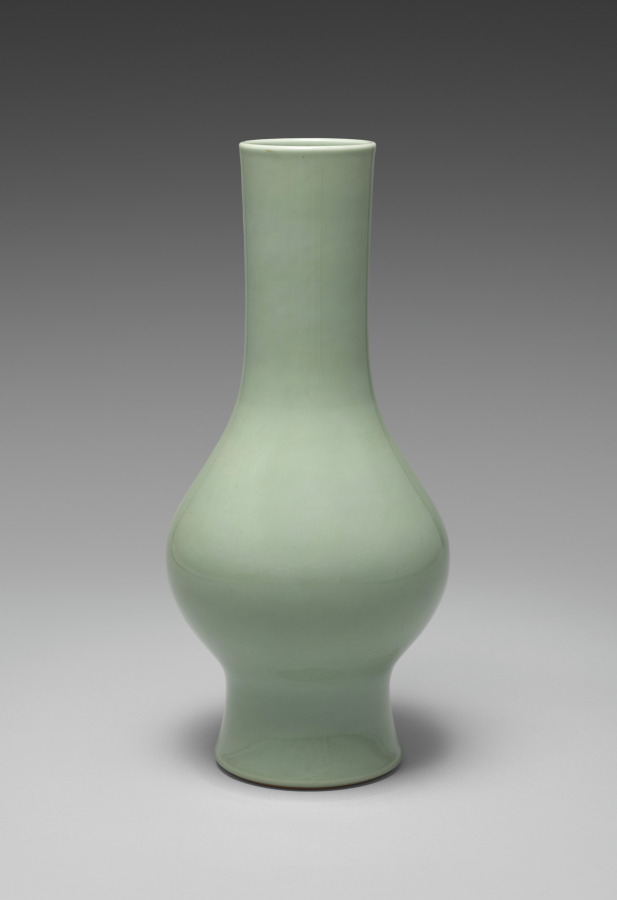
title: Flower Vase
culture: Japan, Meiji period (1868–1912)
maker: Seifū Yohei III (Japanese, 1851–1914)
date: 1912–14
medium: Porecelain with green glaze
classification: Ceramic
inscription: The vase's box lid identifies the vase as hisokuyō (C. mise yao 秘色窯), or “mysterious color ware,” style.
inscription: 清風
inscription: 清風制之 【印】帝室技芸員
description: This flower vase has a tall, slightly flared foot and bulbous body with a slimmer neck. It is completely undecorated but for the hisoku, or “mysterious color,” glaze. Its box lid has a red seal with a flower on it, a rather unusual feature also seen on the box for the green-glazed water container that belonged to the Hosokawa family (see CMA 2022.197).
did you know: The vase's box lid identifies the glaze as hisoku 秘色 or “mysterious color.”